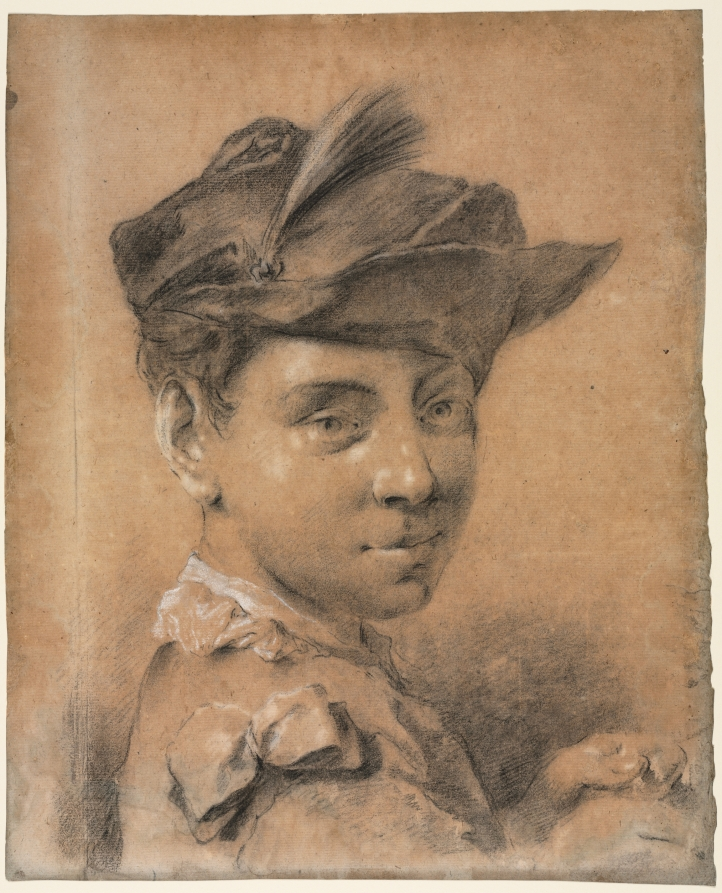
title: Head of a Young Man Wearing a Hat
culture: Italy, Venice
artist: Giovanni Battista Piazzetta (Italian, 1682–1754)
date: before 1735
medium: black chalk heightened with white chalk, with stumping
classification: Drawing